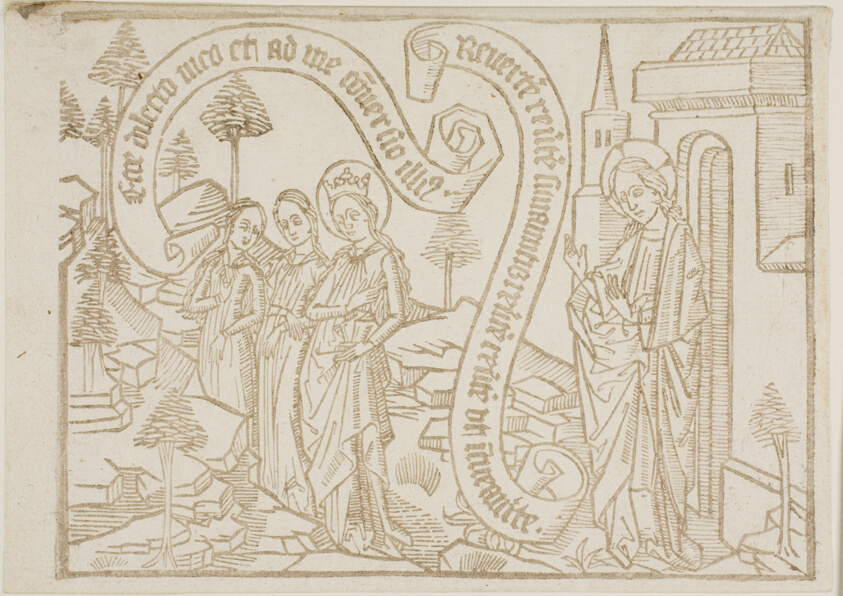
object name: Print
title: Page from the Canticum Canticorum (The Song of Solomon)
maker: Unknown artist (German or Netherlandish)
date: c. 1469-70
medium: Woodcut on paper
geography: Netherlands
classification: woodcut; print; prints and drawing